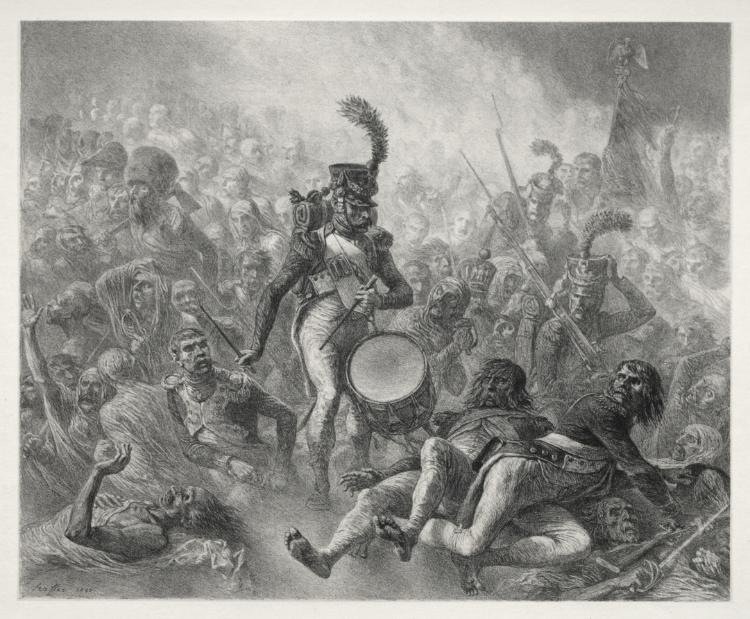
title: Le Réveil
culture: France, 19th century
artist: Auguste Raffet (French, 1804–1860)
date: 1828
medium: lithograph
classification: Print